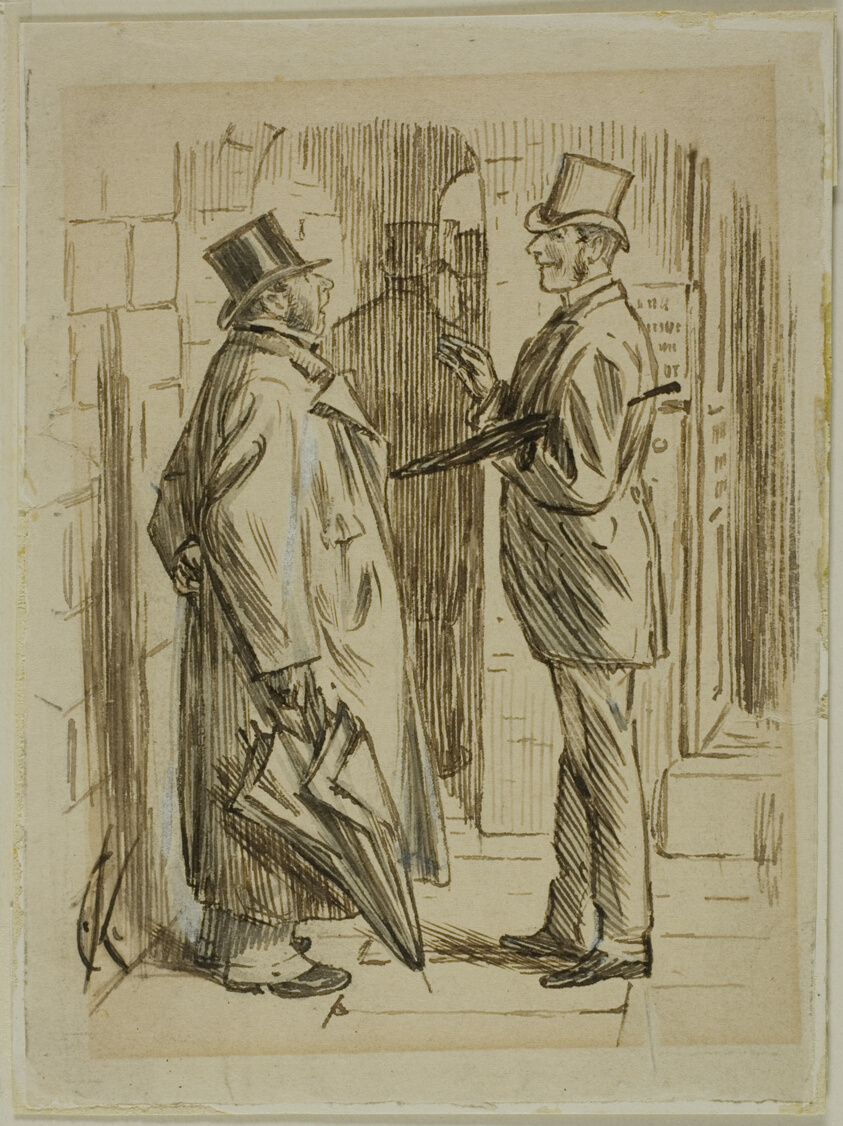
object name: Drawing and Watercolor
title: Upon the Mart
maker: Charles Samuel Keene (British, 1823-1891)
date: 1870/91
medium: Pen and brown ink, with brush and gray wash and touches of white gouache, over traces of graphite, on tan wove paper, laid down on ivory wove card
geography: England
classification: pen and ink drawings; drawings (visual works); prints and drawing